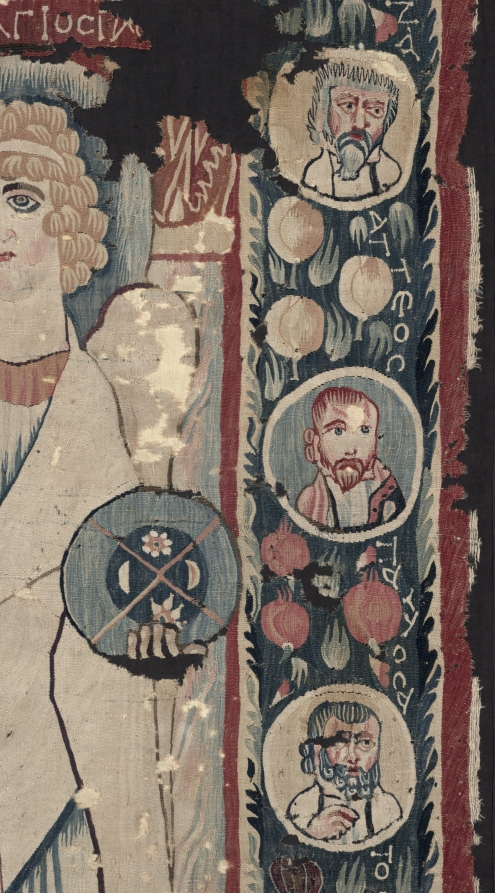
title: Icon of the Virgin and Child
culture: Egypt, Byzantine period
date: 500s CE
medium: wool and dye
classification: Textile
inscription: on the lintel of the architectural setting, the Greek inscription translates as: The Holy Michael, The Holy Mary, The Holy Gabriel. The wide foliate border is decorated with fruits and flowers and, in the lower part, with medallions containing the busts of apostles whose names are inscribed nearby in Greek and are translated as: Andrew, Matthew, Paul the Apostle, Luke, James, Phillip, Mark, Thomas, John, Matthias, Peter, and Bartholomew.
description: Woven from more than 20 colors of woolen thread, this rare tapestry was more expensive than a painting when it was made. The historical price reflected contemporary viewers’ appreciation for the skilled color blending by the weavers. Hung on a wall, this tapestry allowed viewers to venerate (honor) the Virgin Mary and the Christ Child in the Christian Orthodox church. Angels and apostles surround them, their names written in Greek. To be spiritually effective, an icon (devotional image) should follow its subject’s established visual tradition as closely as possible.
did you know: Created in Egypt's hot and dry desert climate, this tapestry features a border of lush greenery and fruits, while flowers peek out from around the throne of the Virgin. Imagine encountering this artistic oasis in a Coptic church during the dry heat of the day.